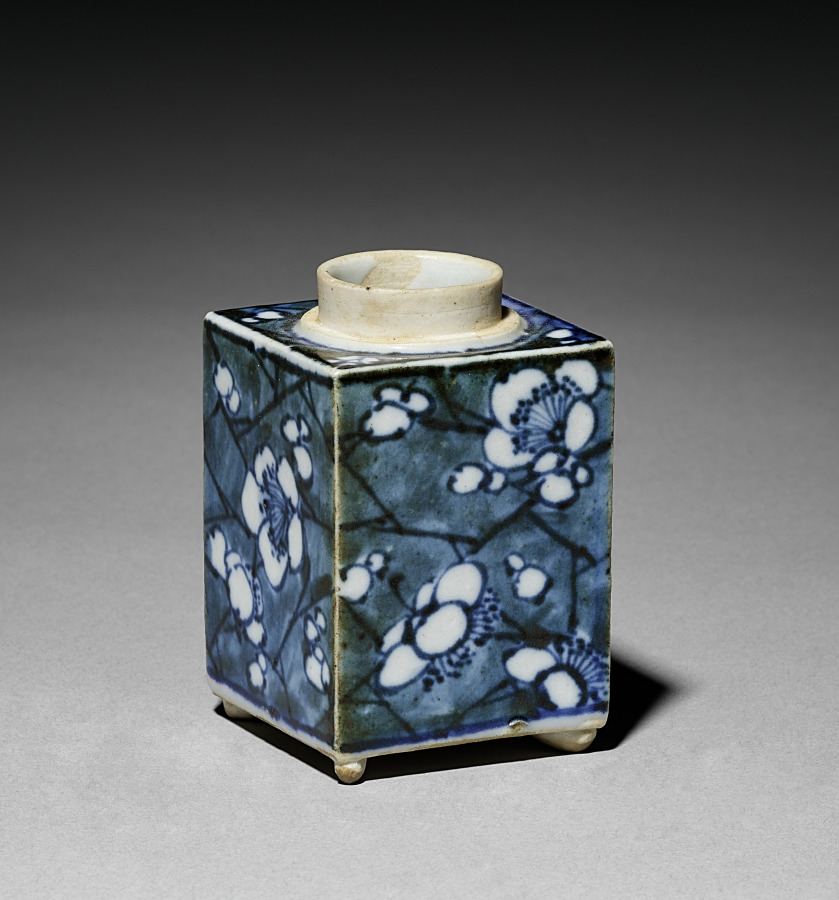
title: Tea Container with Plum Blossoms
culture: Japan, Edo period (1615–1868)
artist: Aoki Mokubei (Japanese, 1767–1833)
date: early 1800s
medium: porcelain with underglaze blue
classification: Ceramic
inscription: signed "Ro Mokubei" on base in underglaze blue.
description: Aoki Mokubei, born into a family of restaurateurs, was a potter, calligrapher, painter, and scholar, and is considered one of the three masters of later Edo period Kyoto ceramics. He specialized in porcelains fashioned after Chinese prototypes, and created works for steeped tea (sencha) such as these matching tea caddies decorated in an underglaze blue called sometsuke—literally “with applied dye.” He signed them on their bottoms. They also have intricately patterned silk sleeves to both beautify and protect them. On the exterior of the lid of the outer wooden box that contains them, it is written that Mokubei inscribed and painted an image on the box. On the interior of the lid, the signature and seals of a former owner are written. Mokubei has signed the lid of the inner box, and a charming ink and light color composition of West Lake in Hangzhou in China covers its three sides. On the fourth side is a long inscription by Mokubei describing the scene.